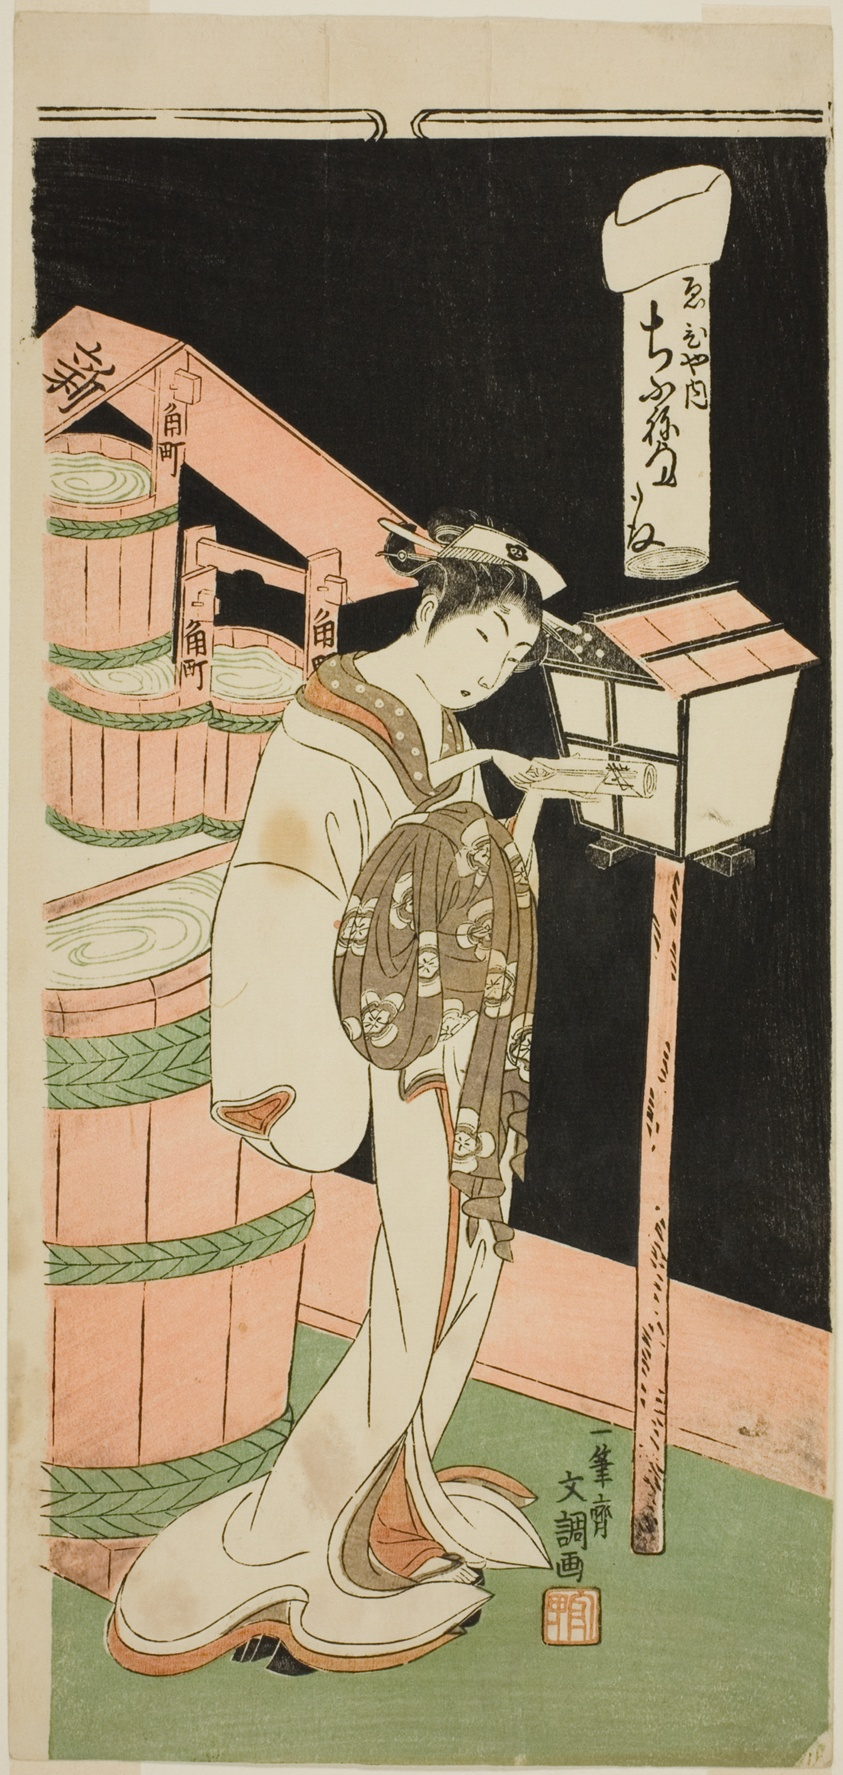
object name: Print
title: The Courtesan Chibune of the Ebiya House, from the series "Fuji-bumi (Folded Love-letters)"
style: Japanese (culture or style)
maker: Ippitsusai Buncho (Japanese, active c. 1755-90)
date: c. 1769/70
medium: Color woodblock print; hosoban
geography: Japan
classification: woodblock print; print; asian art